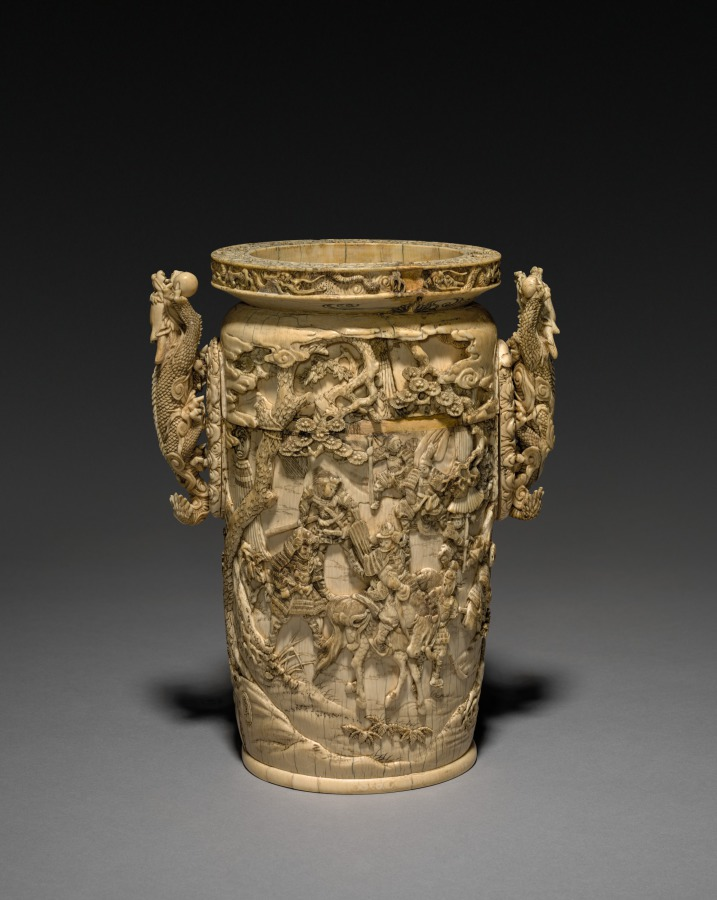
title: Carved Vase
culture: Japan, Edo period (1615–1868) to Meiji period (1868–1912)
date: 1800s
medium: ivory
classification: Ivory